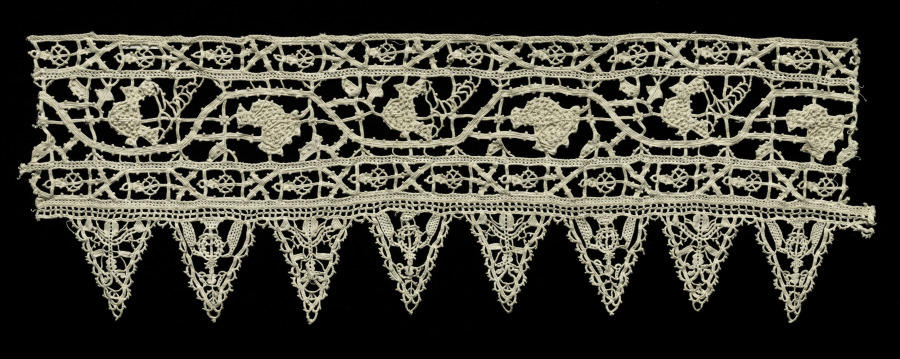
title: Lace Cuff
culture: Italy, Venice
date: 1500s–1600s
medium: Linen: needle lace (punto in aria)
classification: Lace